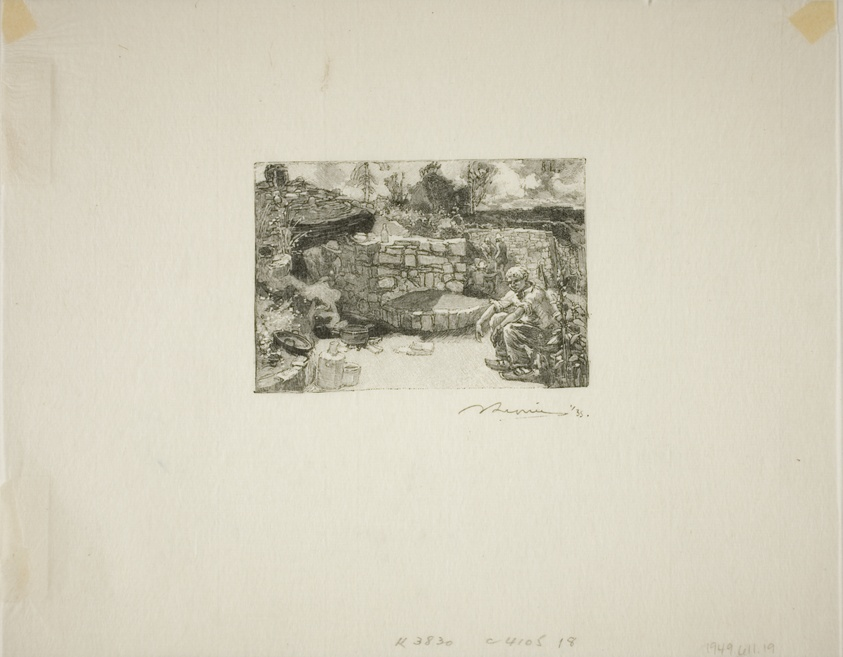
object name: Print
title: Quarryman's Hut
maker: Louis Auguste Lepère (French, 1849-1918); published by A. Desmoulins (French, active c. 1908-1910)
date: published 1908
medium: Wood engraving in black on cream laid Japanese paper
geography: France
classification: wood engraving; print; prints and drawing